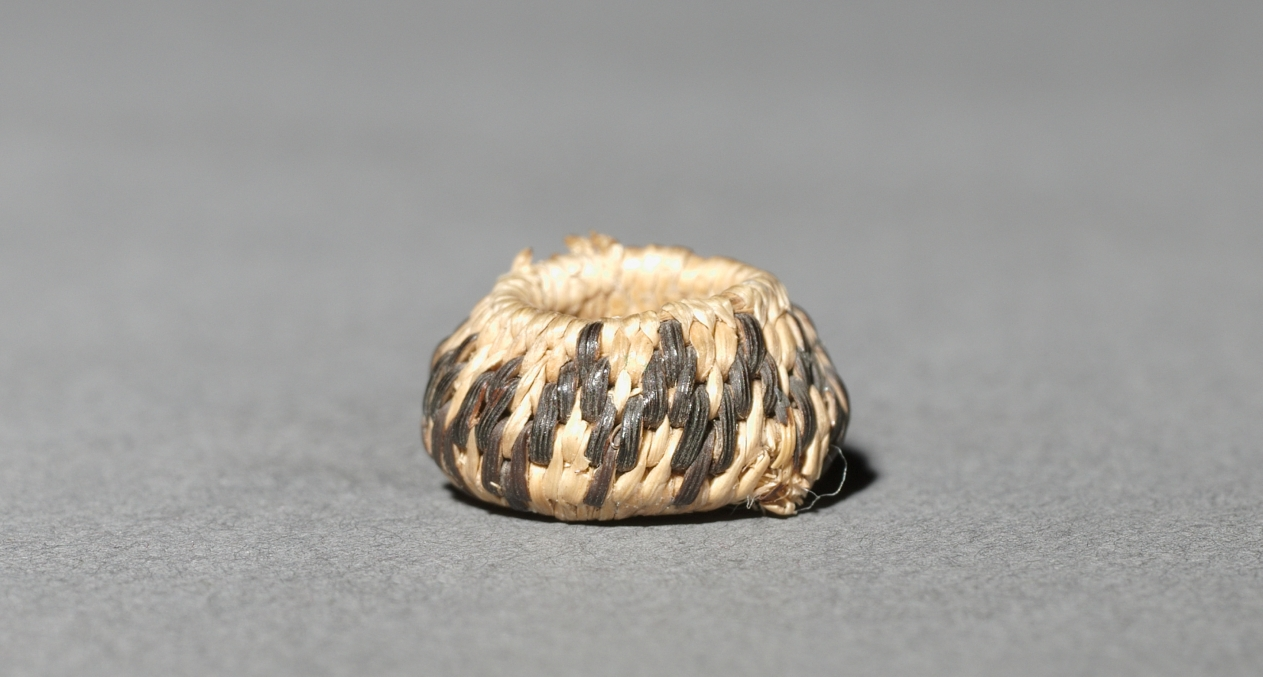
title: Miniature Round Basket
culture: California, Pomo, late 19th-early 20th century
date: late 1800s-early 1900s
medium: plant materials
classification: Basketry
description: Miniature baskets were made to demonstrate the basket-maker’s virtuoso skill, and these tiny marvels seem to be no exception—the smallest are only five millimeters wide but still patterned. For such fine work, dexterity was required as much for preparation of materials as for weaving.